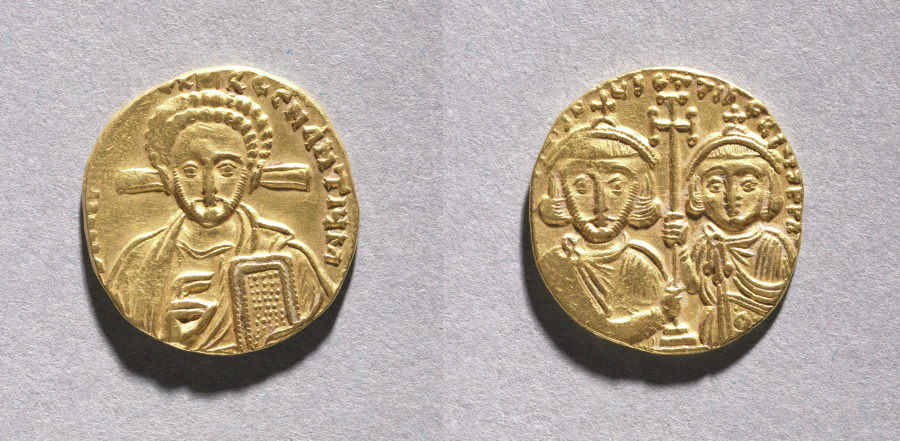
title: Solidus with Justinian II Rhinometus and His Son Tiberius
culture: Byzantium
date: 705–711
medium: gold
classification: Coins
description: The vast number of surviving Byzantine coins attests to the level of trade across the empire. Controlled and supervised by the emperor, the producers of coins took care to represent his authority and reflect his stature. Talented artists were recruited to engrave the dies (molds) used for the striking of coins. Emperors increasingly came to include their heirs and co-emperors on their coinage, as well as other family members or even earlier rulers. Coins were recognized, then as now, as small, portable works of art. With their inscriptions and images, Byzantine coins provide valuable documentation of historical events and a record of the physical appearance of the emperors. The coins shown here include the solidus, the basic gold coin of 24 karats; the tremissis, a gold coin of one-third the weight and value of the solidus; and the nomisma, which in the 10th century replaced the solidus as the standard gold coin.